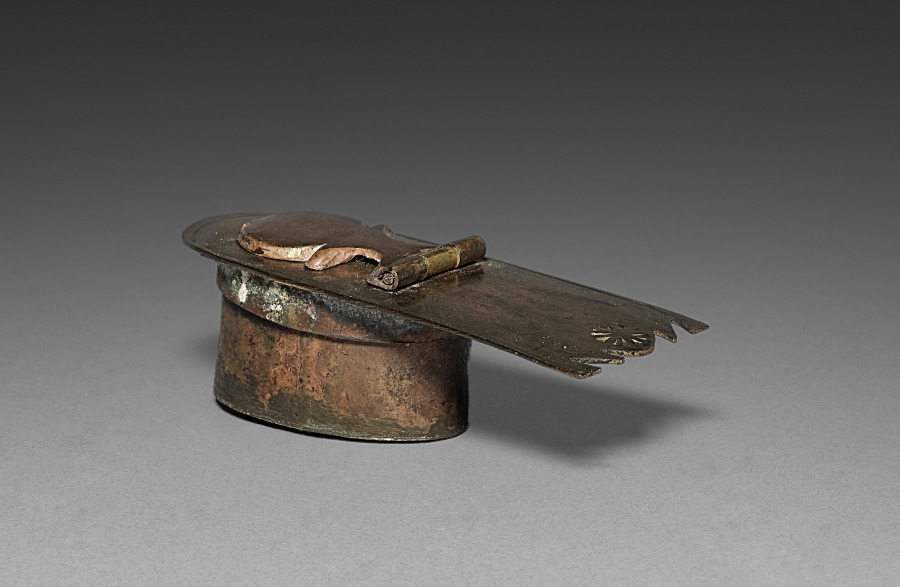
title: Pen and Ink Box (inkwell)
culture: Iran, probably Isfahan, Safavid period (1501–1722)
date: 1667–98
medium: brass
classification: Metalwork